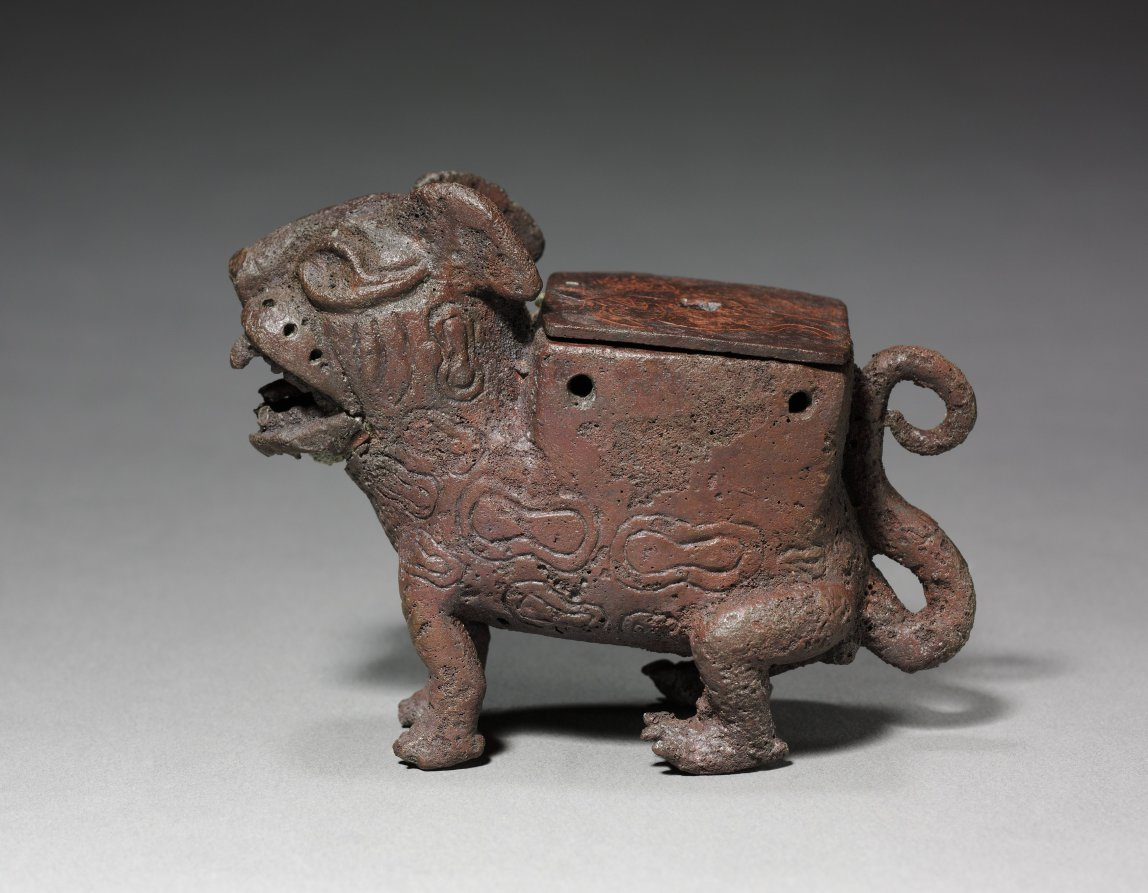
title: Male Feline-Shaped Container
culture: Peru, North Coast, Moche style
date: 50–800 CE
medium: cast copper alloy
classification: Sculpture